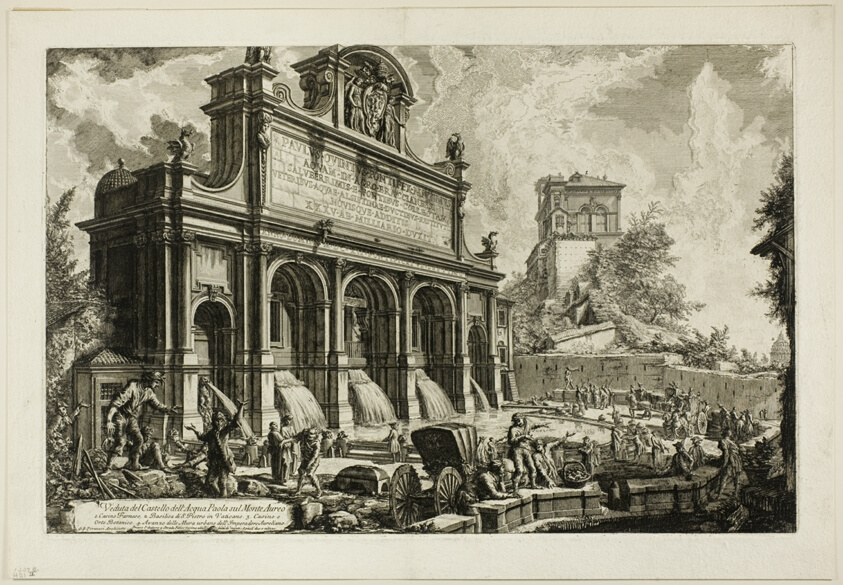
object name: Print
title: View of the Fountainhead of the Acqua Paola on Monte Aureo, from Views of Rome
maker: Giovanni Battista Piranesi (Italian, 1720-1778)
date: 1750/59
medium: Etching on heavy ivory laid paper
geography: Italy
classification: etching; print; prints and drawing